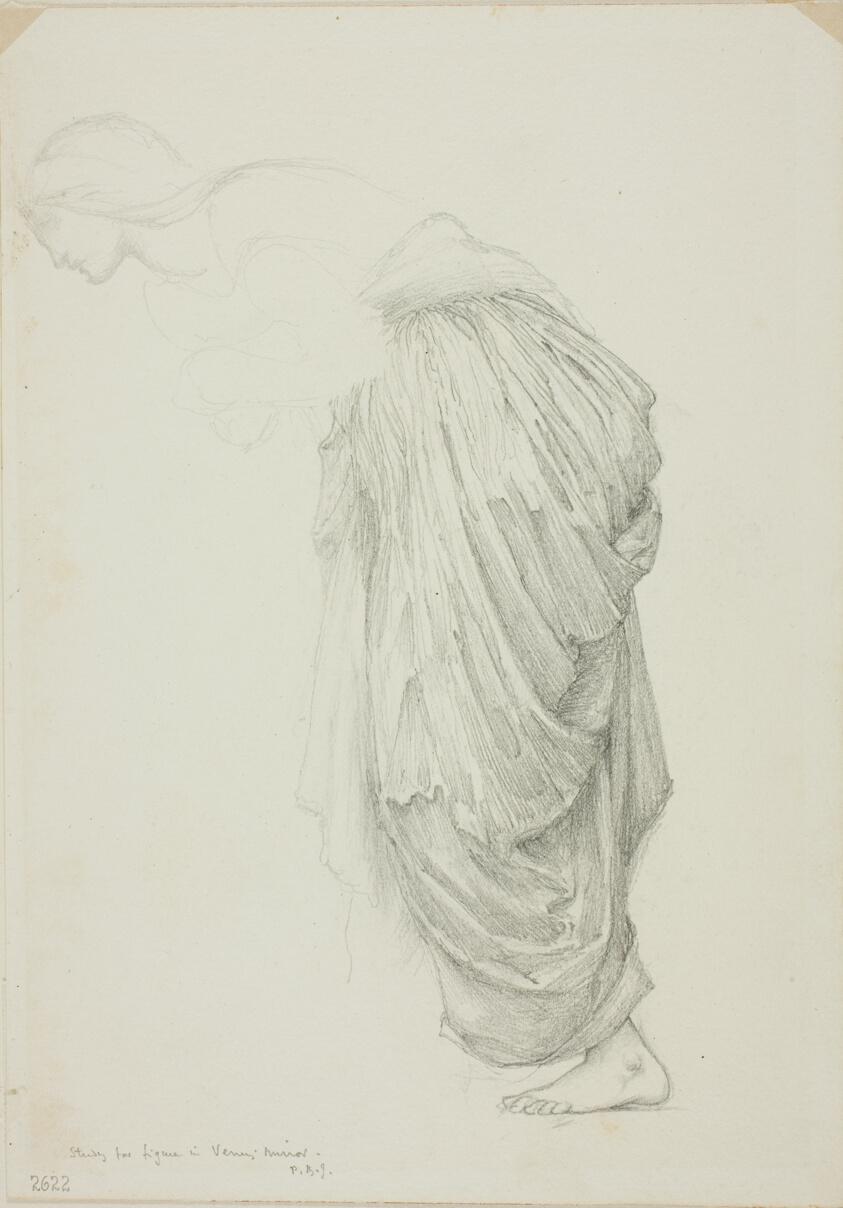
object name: Drawing and Watercolor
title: Bending Female Figure, study for Mirror of Venus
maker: Sir Edward Burne-Jones (English, 1833-1898)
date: c. 1873–77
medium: Graphite on ivory wove paper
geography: England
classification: graphite; drawings (visual works); prints and drawing